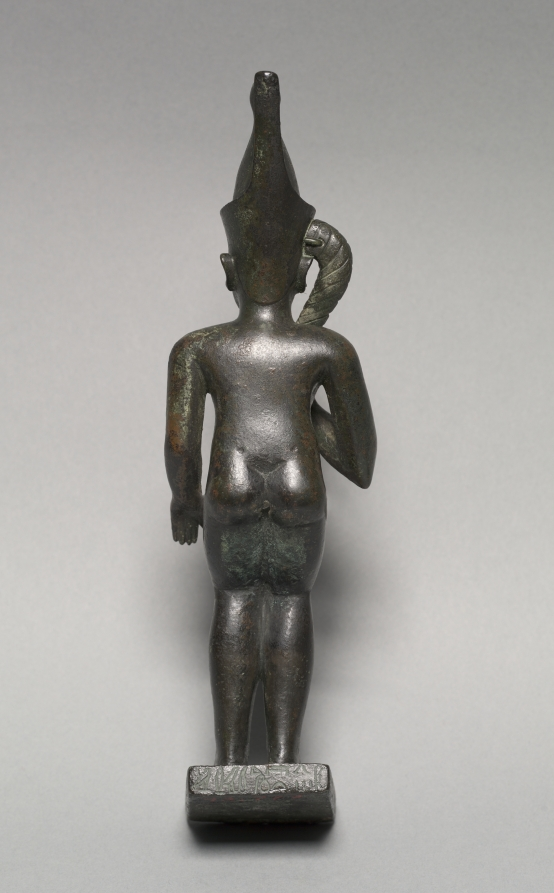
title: Statuette of Harpocrates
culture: Egypt, Greco-Roman period (332 BCE–395 CE), Ptolemaic dynasty (305–30 BCE)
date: 304–30 BCE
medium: bronze, solid cast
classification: Sculpture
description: Horus the Child (Harpocrates) was always shown in the childish attitude of holding a finger to his mouth.